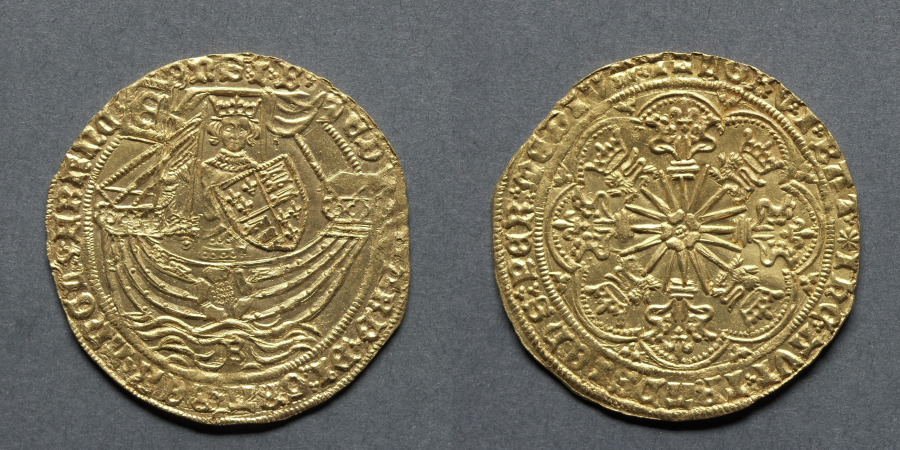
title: Ryal: Edward IV in Ship with a Shield of Arms and Rose (obverse); Sun with Fleurs (reverse)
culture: England, Edward IV (first reign 1461-1470, second reign 1471-1483)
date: 1464/5–70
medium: gold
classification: Coins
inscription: ЄD · · WΛRD’ · DI · GRΛ’ · RЄX · ΛNGL’ · Z · FRΛn · · C DNS’ · I · B’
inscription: IhC’ · ΛVT’ · TRΛnSIЄnS · PER · mЄDIVm · ILLORVm : I · BΛT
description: The first and second reigns of Edward IV, who was restored to the throne, were a result of the dynastic civil war between the houses of York and Lancaster, usually known as the Wars of the Roses. The fighting flared up sporadically from 1455 to 1485. With the accession of Edward IV the gold supply was almost nil and after four years the output had been reduced to 300 ibs. Something had to be done without disturbing the country, so a new coin was issued, to be known as the Ryal or Rose Noble. This coin was to have a value of ten shillings. However the gold noble had become the standard professional fee (6s 8d), so a new gold coin known as the angel was issued, with a value of 6 shillings and 8 pence. It became the famous coin that served Tudor and Stuart sovereigns as their presentation piece at the ceremony of touching for the king's evil. The angel pictured St. George slaying the dragon, some say as an allegory of the overthrow of the house of Lancaster by that of York. This is the last of the Noble-type coins. Though the reigns changed over the years, the type of coin varied little in design. During the reign, branch mints were set up in York, Bristol, Coventry, and Norwich.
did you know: Edward IV (1442–1483) was King of England from March 4, 1461, to October 3, 1470, and then again from April 11, 1471, until his death in 1483.